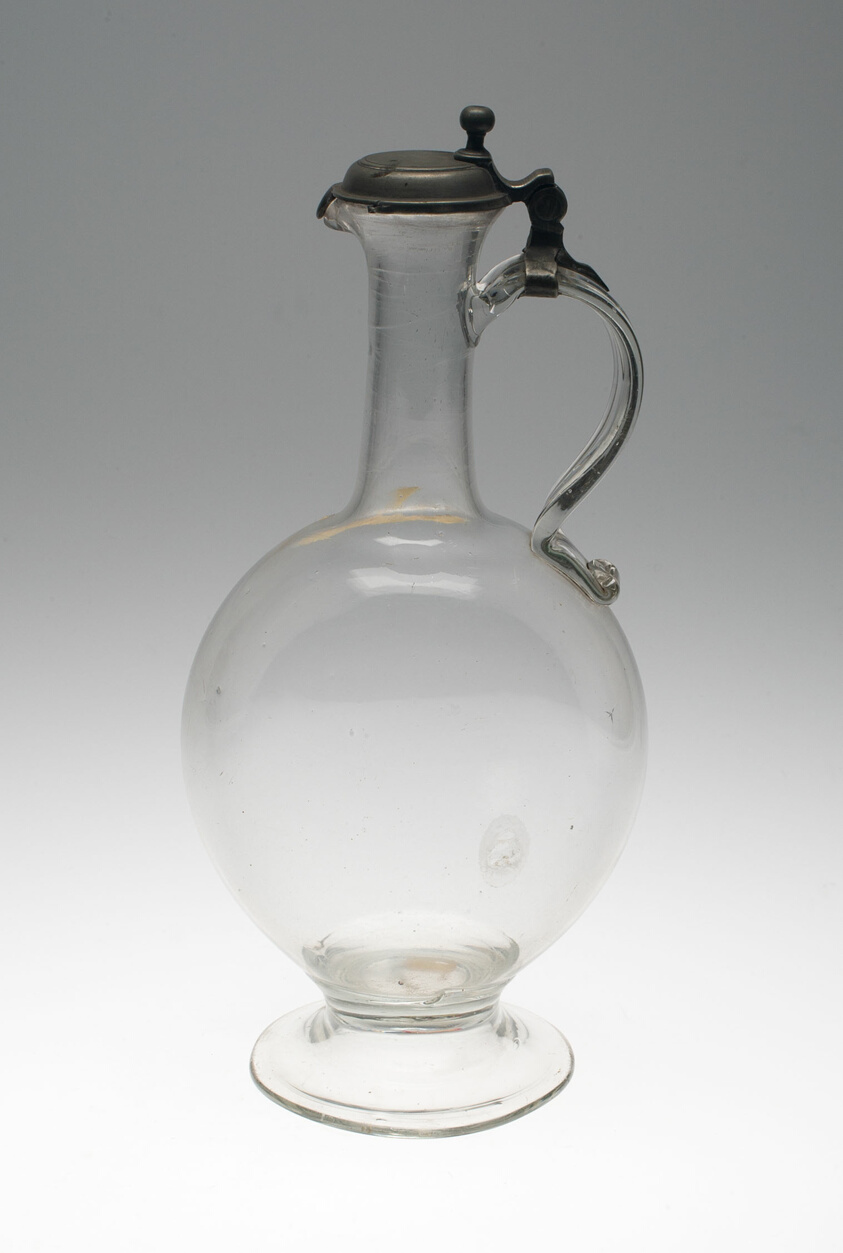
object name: Glass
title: Flagon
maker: Flanders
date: c. 1750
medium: Glass with pewter mount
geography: Flanders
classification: glass; european decorative arts